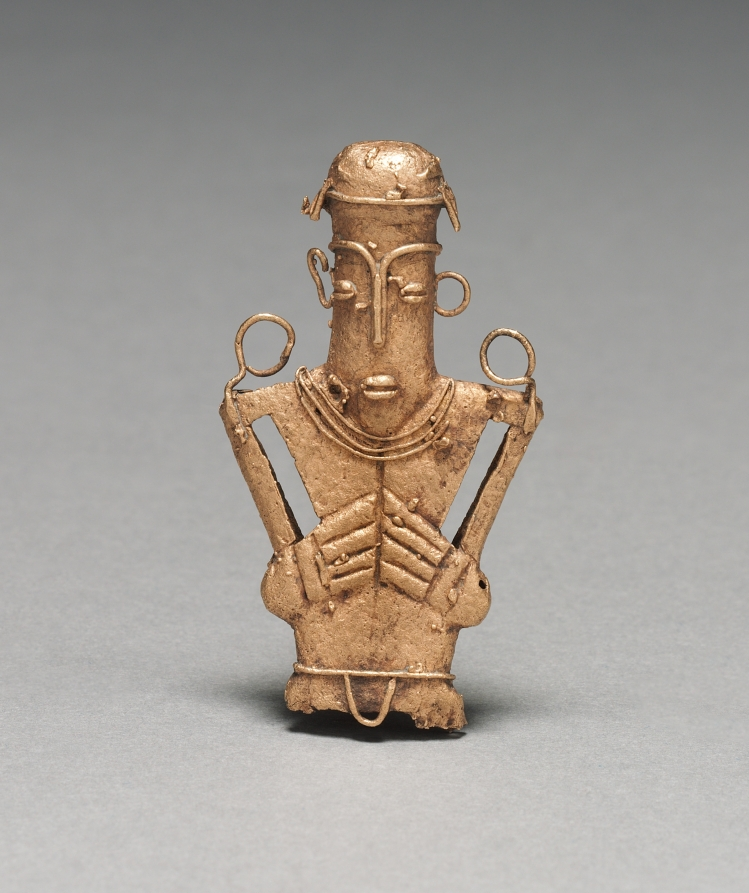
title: Tunjos (Votive Offering Figurine)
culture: Colombia, Muisca style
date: c. 900–1550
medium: cast gold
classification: Metalwork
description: Unlike the other gold ornaments in this gallery, tunjos were not worn; instead, they served as offerings that were deposited in sacred places, such as lagoons and caves. They often depict humans who hold something-here a container with a head (1947.22), a spear thrower (1947.19), and a bird-tipped (1957.25). The subject must have corresponded to a benefit being asked from the gods. Perhaps because they were not meant for display, tunjos were not finished after lost-wax casting. Flaws remain uncorrected, surfaces are unpolished, and gold that backed into the sprue (pouring channel) was left in place, creating the button-like form at the bottoms of 1947.24 and 1947.17, which were cast upside down.